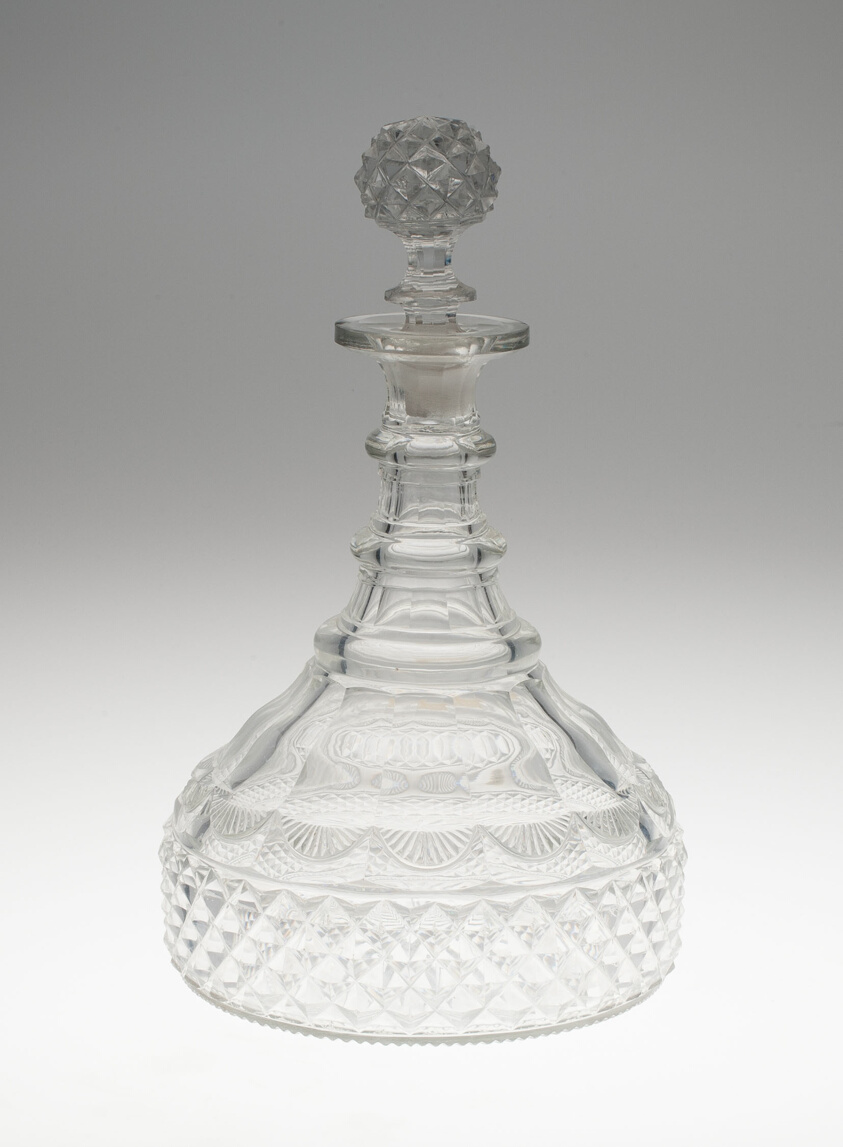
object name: Glass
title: Decanter with Stopper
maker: England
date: c. 1800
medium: Glass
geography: England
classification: glass; european decorative arts